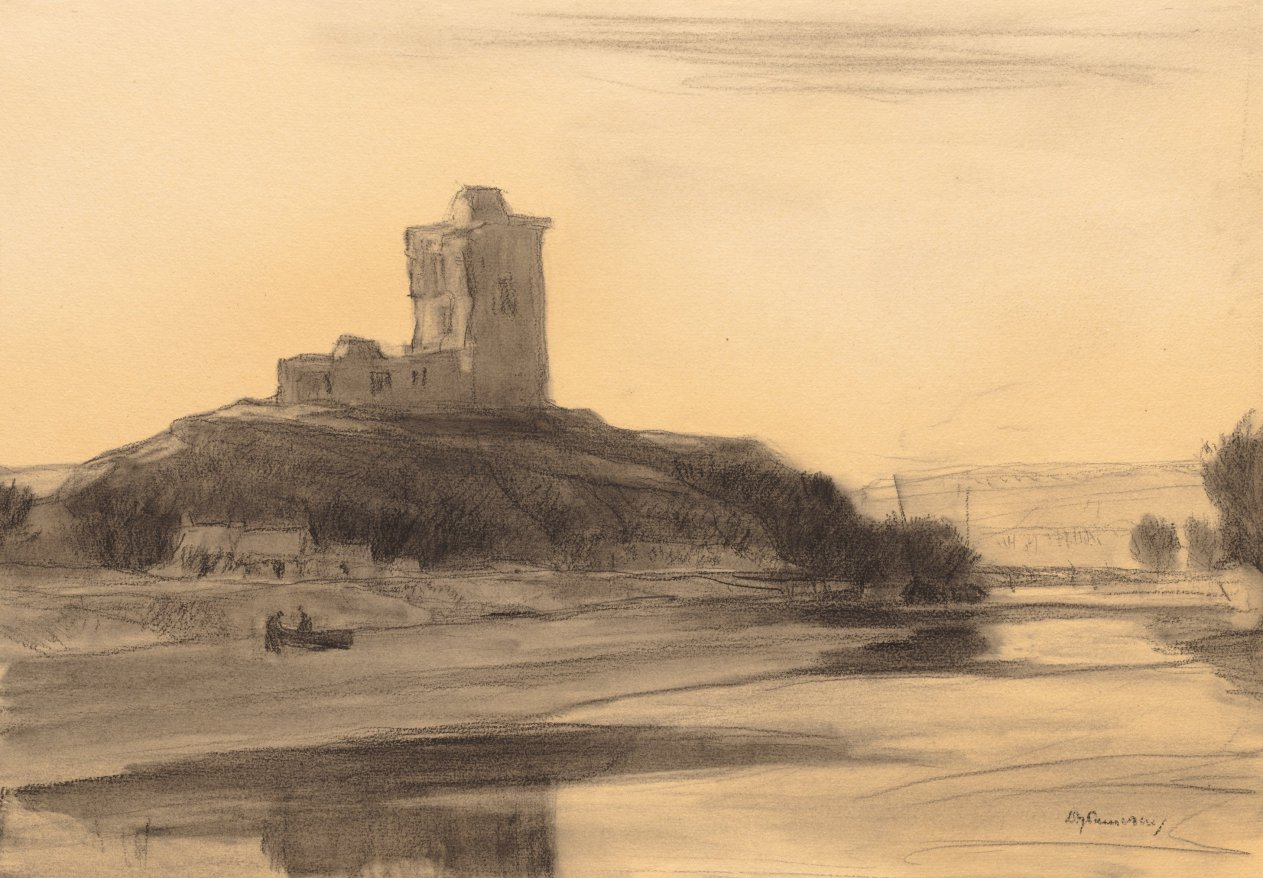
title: The Red Castle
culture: England, 19th-20th century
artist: David Young Cameron (British, 1865–1945)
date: c. 1885–1940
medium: charcoal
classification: Drawing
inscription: Signed in charcoal, lower right: "D.Y. Cameron"